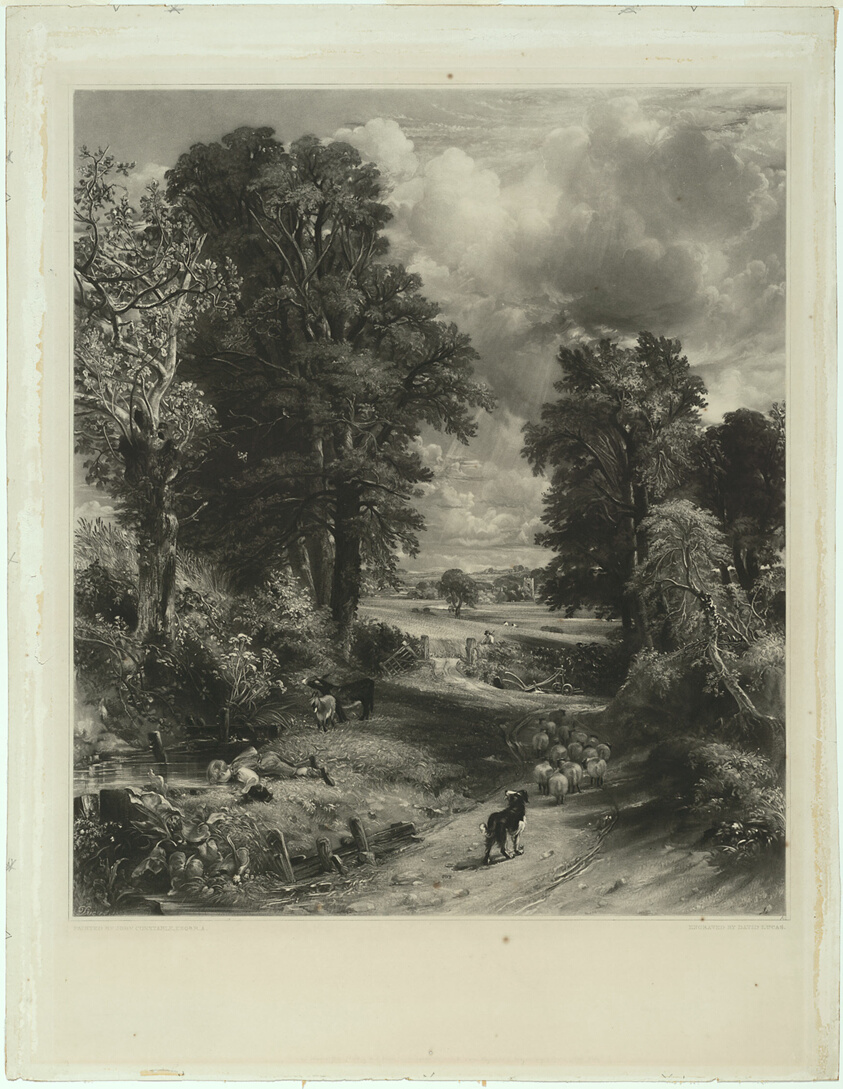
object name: Print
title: The Cornfield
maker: David Lucas (English, 1802-1881); after John Constable (English, 1776-1837)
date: 1832–34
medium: Mezzotint on ivory wove paper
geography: England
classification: mezzotint; print; prints and drawing